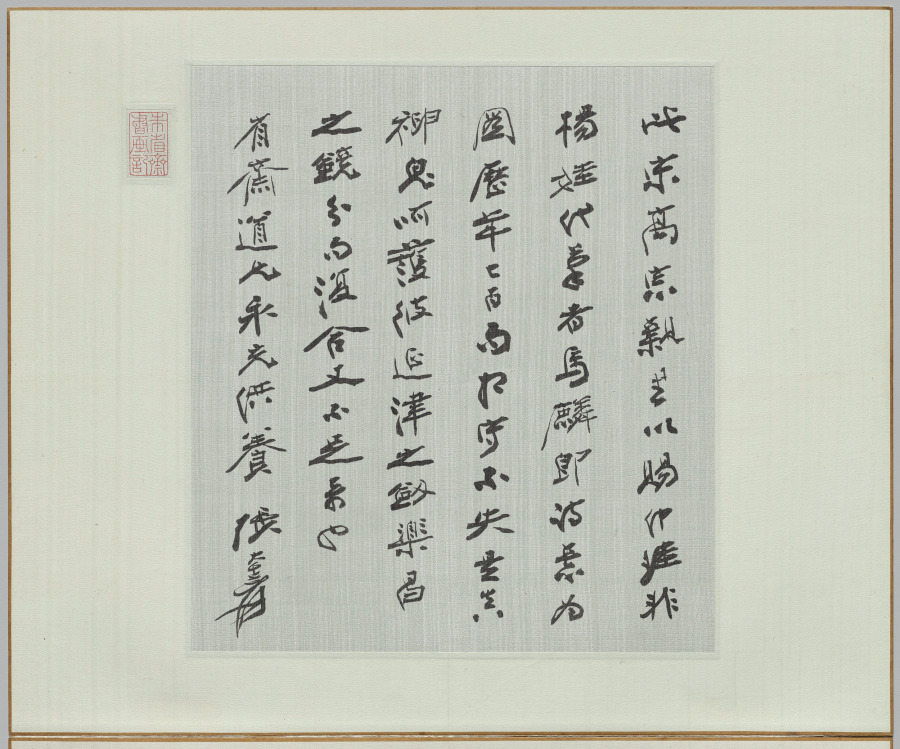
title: Poem by Wang Wei in the Cursive Script Style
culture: China, Southern Song dynasty (1127-1279)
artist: Song Lizong (Chinese, 1205–1264)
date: 1256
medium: Album leaf; ink on silk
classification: Calligraphy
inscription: 行到水窮處 坐看雲起時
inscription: The inscription between the two imperial seals reads, "Presented to Chung-kuei".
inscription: The top gourd-shaped seal has the cyclical date "bingchen" (丙辰 1256); the lower square seal is the Seal for Imperial Calligraphy.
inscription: The facing leaf has an inscription by Zhang Daqian 張大千 (1899–1983).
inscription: 1 seal of Chu Sheng-chai (20th Century) remounted onto the facing leaf to the left of the square calligraphy.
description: Poem and painting, once mounted together as one fan, exemplify the collaboration between imperial patron and court painter. Emperor Lizong’s calligraphy cites a verse from Wang Wei’s (701–761) poem, Walking to where the water ends, I sit and watch when clouds arise. Ma Lin’s response is this painting. At the water’s edge, a scholar reclines by a large rock. The view leads across the empty middle ground to a distant mountain. With sparse ink and subtly graded washes, Ma Lin visualizes the poetic verse. The painting suggests the impact of Chan aesthetics through interaction between the palace, literati-officials, and monasteries around Hangzhou. The leaf facing Emperor Lizong’s calligraphy has an inscription by Zhang Daqian (1899–1983).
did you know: Emperor Lizong had little interest in governmental affairs, but he was perhaps the finest calligrapher among the Song emperors.